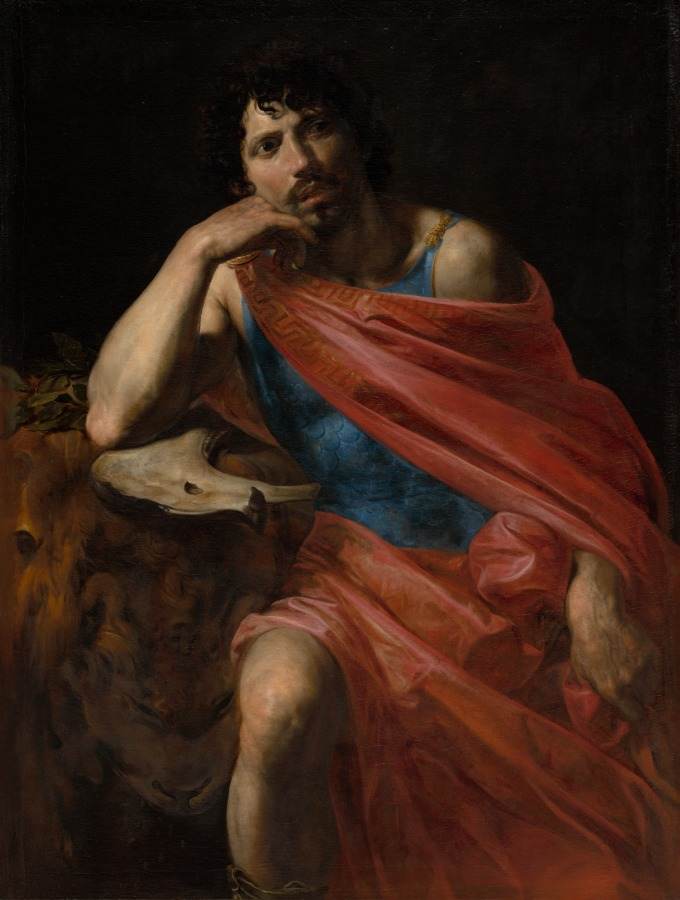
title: Samson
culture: France, 17th century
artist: Valentin de Boulogne (French, 1591–1632)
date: 1630–31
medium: oil on canvas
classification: Painting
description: The Old Testament hero Samson rests his head on his hand in a pensive, even melancholic pose. Objects on the table recall two of his heroic deeds: he killed a lion with his bare hands, and liberated the Israelites by slaughtering a thousand Philistines with a donkey’s jawbone. Samson’s cuirass, or breastplate, is joined at the shoulder by a clasp in the form of two bees—the emblem of the Barberini family, who commissioned the painting around 1630. In 1627, the Barberini had engaged Valentin to paint another biblical hero, David victorious with the head of Goliath; the canvas depicting Samson was designed to be its pendant.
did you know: The figure of Samson was likely a self-portrait of the artist.